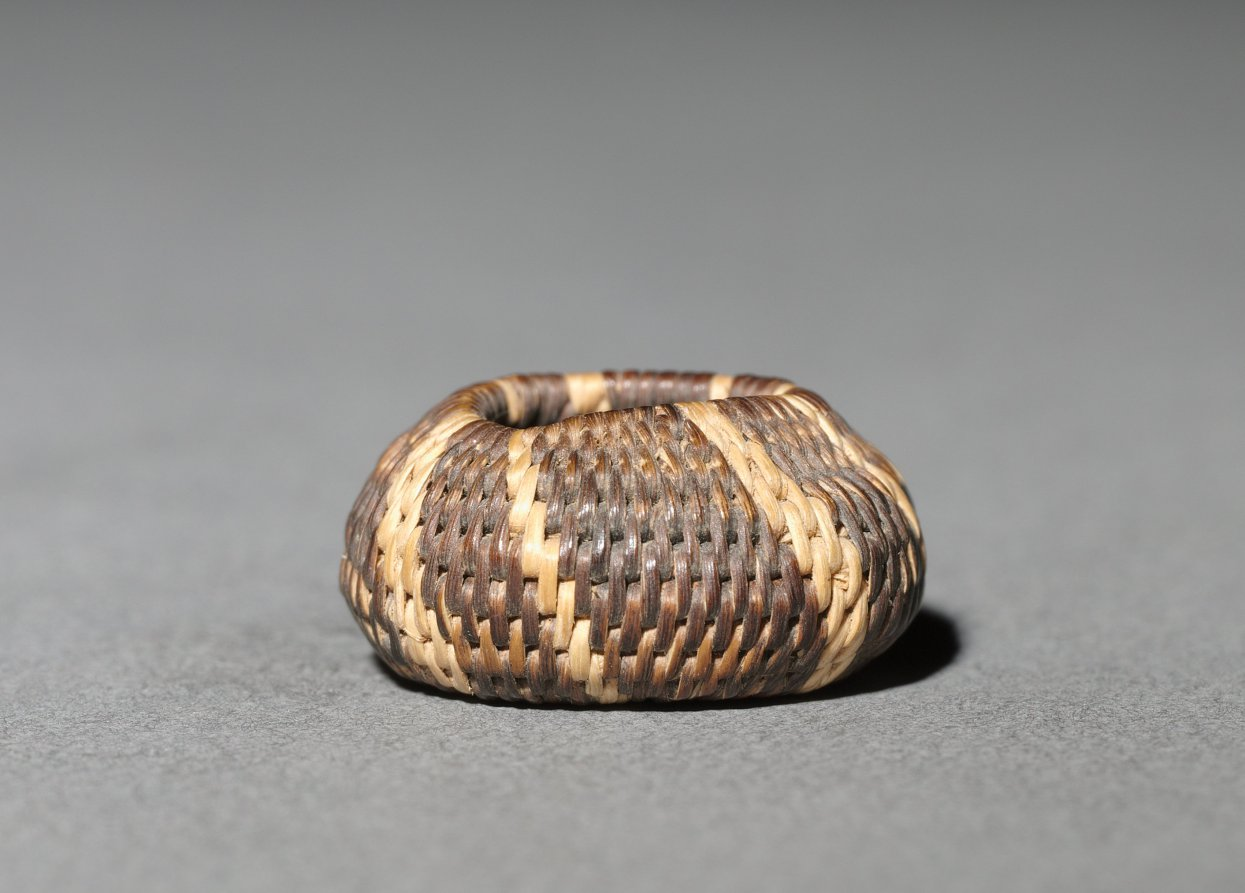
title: Miniature Basket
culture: America, Native North American, Southwest, Arizona, Akimel O'odham (Pima), Unassigned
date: before 1923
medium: plant fiber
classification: Basketry